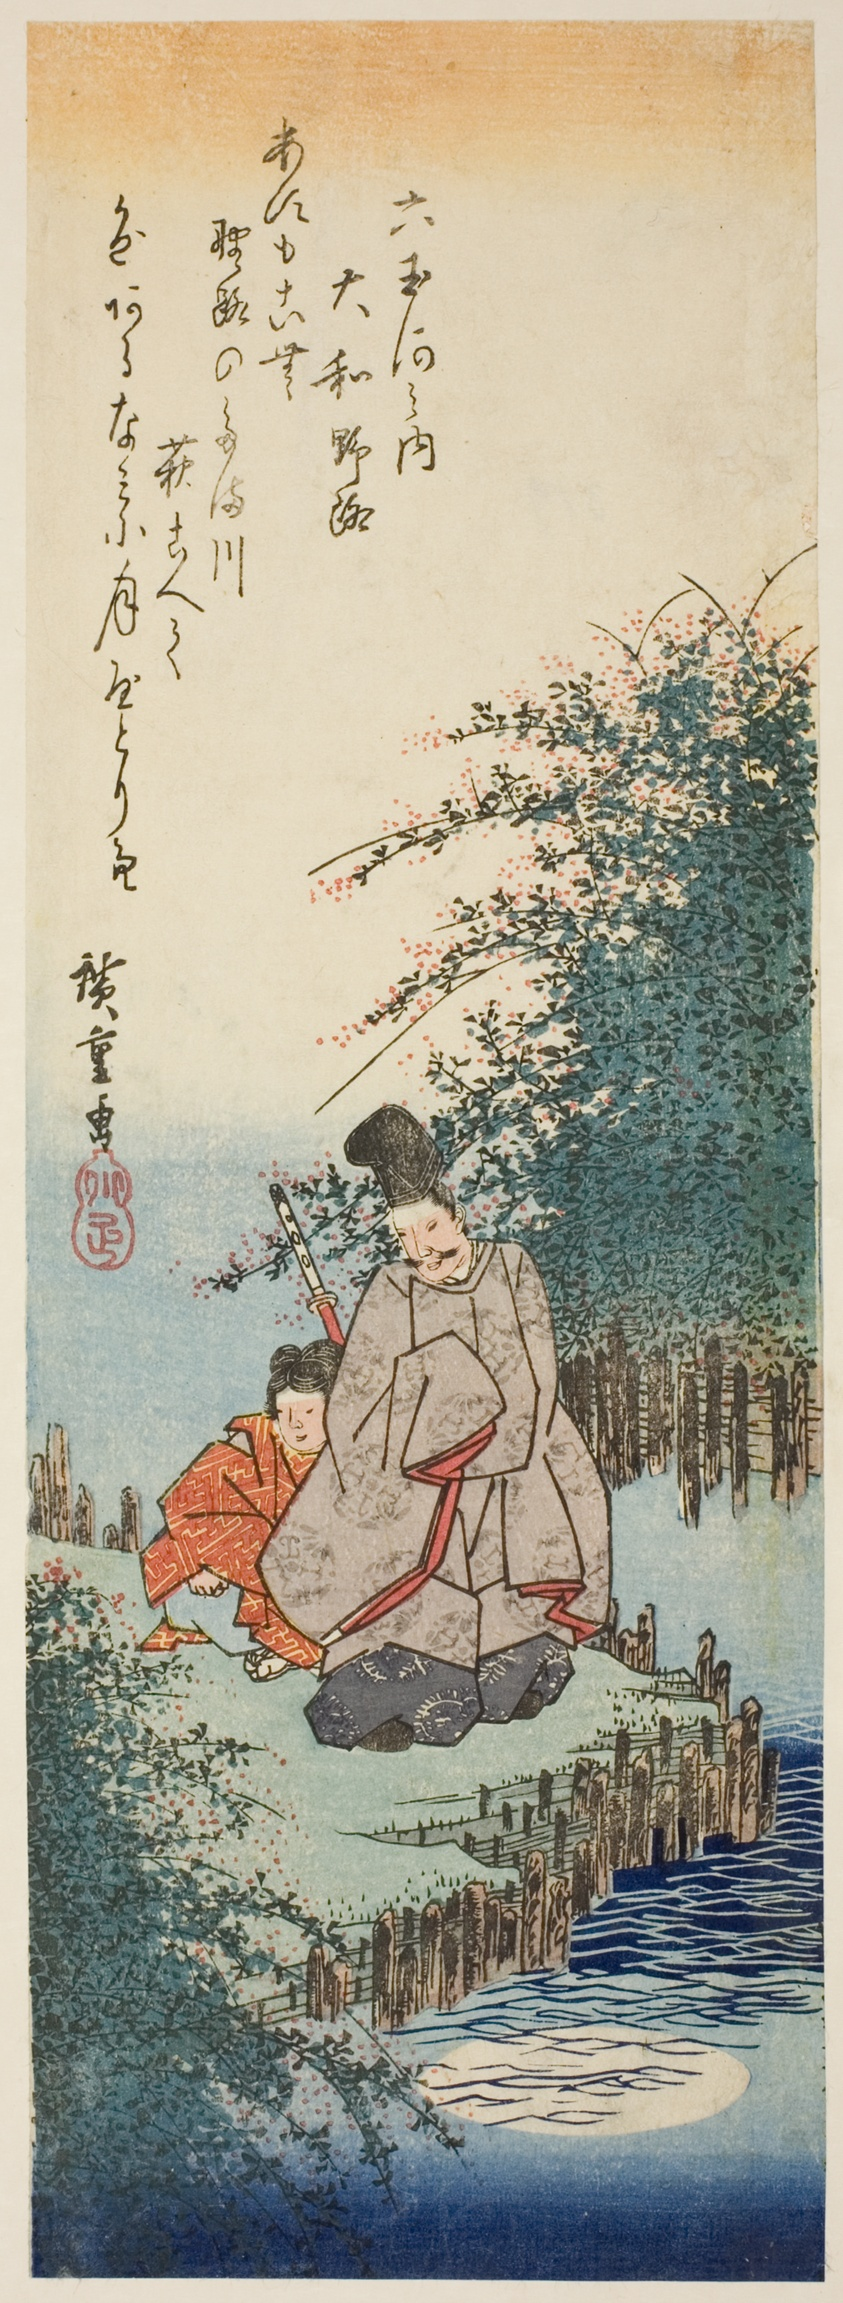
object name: Print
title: Noji Jewel River in Yamato Province (Yamato Noji), from the series "Six Jewel Rivers (Mu Tamagawa no uchi)"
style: Japanese (culture or style)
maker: Utagawa Hiroshige 歌川 広重; Japanese, 1797-1858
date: c. 1835/39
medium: Color woodblock print; chutanzaku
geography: Japan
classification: print; asian art